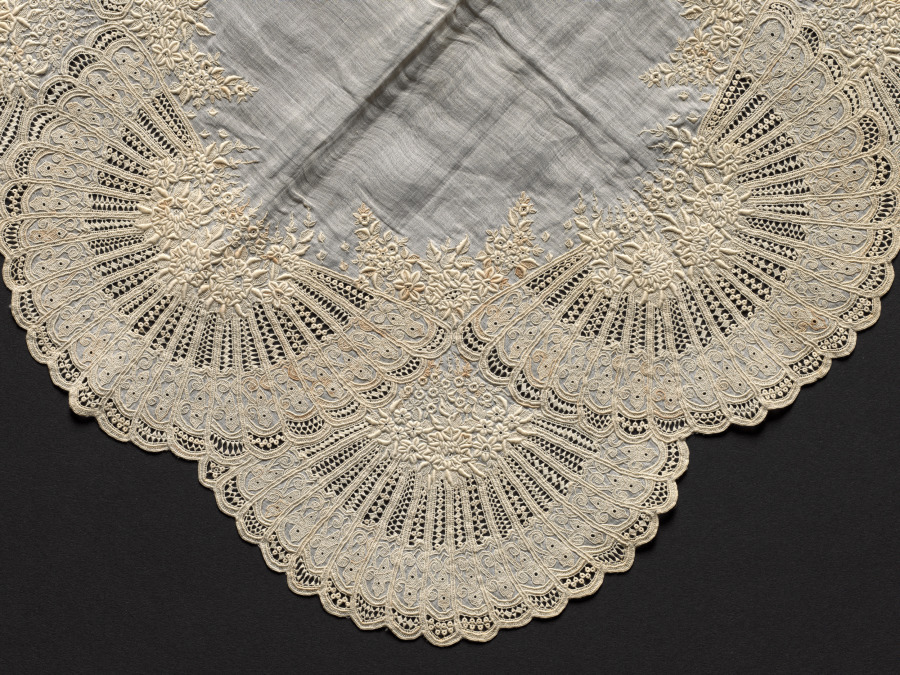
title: Embroidered Handkerchief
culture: Switzerland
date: 1850–99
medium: Plain weave linen with embroidery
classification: Embroidery